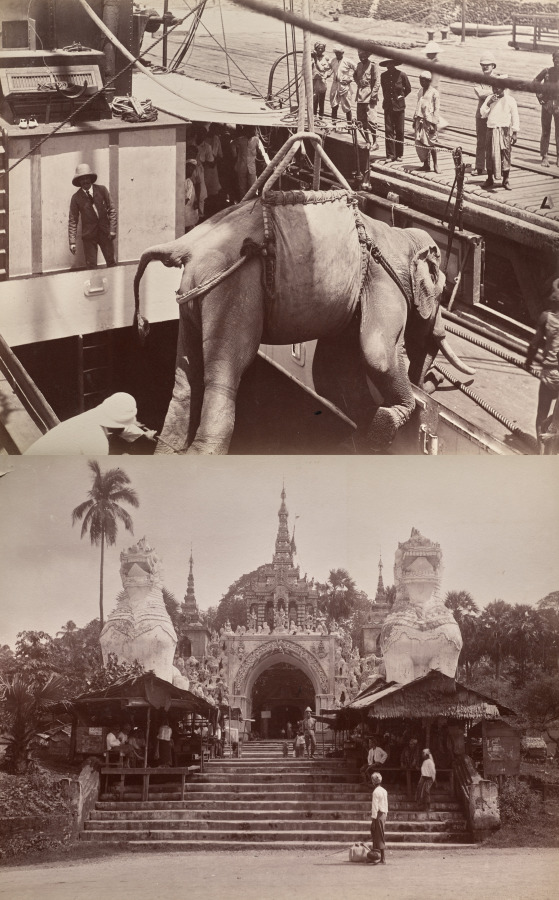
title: Untitled: (elephant being loaded onto a ship, recto); (steps and building, verso)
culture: England, 19th century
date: 1870s-1880s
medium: Album page with two albumen prints mounted on both sides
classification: Photograph